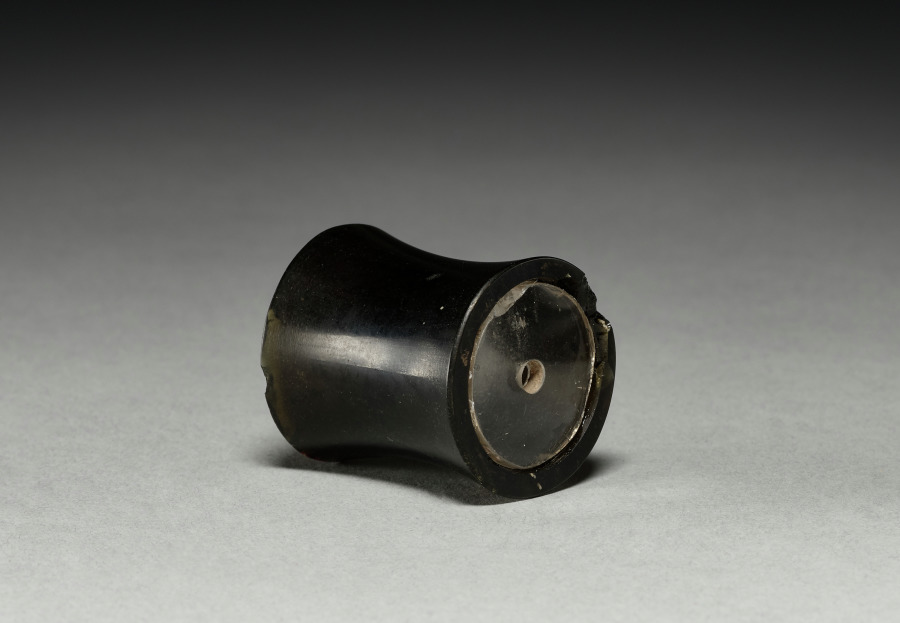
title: Ear Ornament (1 of 2)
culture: Mexico, Guerrero, Ichcatiopan, Mixtec or Aztec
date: c. 1200–1519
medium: obsidian, crystal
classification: Jewelry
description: This set of ear ornaments was reputedly found together with the gold and jade pectoral ornament shown nearby. They may have accompanied a noble burial, or perhaps constituted an offering deposit.